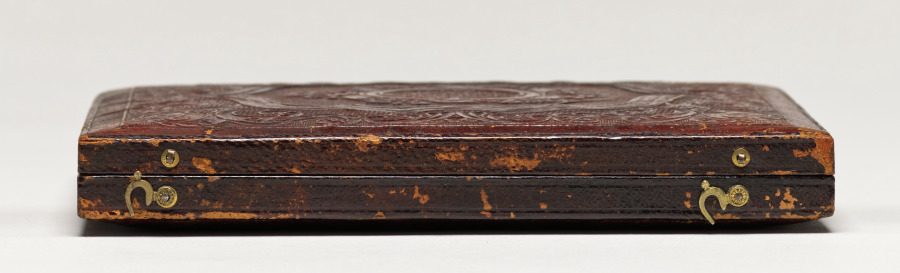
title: St. Anthony Falls from Across the River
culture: America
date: c. 1853–54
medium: daguerreotype, half-plate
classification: Photograph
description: In this image of St. Anthony Falls, the unidentified daguerreotypist made an "instantaneous view" of a remarkable natural wonder, rendering its specific geological formation with exacting clarity. Above a narrow channel where the Mississippi River runs between steep bluffs in Minneapolis, Minnesota, the falls churns away at the bedrock over which it descends. Named by Father Louis Hennepin during his travels in 1680, it is the only significant waterfall on the entire Mississippi River. The specific motivations of the photographer remain unknown. He or she may have wished the photograph to be scientific and documentary, a valuable visual aid for an artist, or just a reminder to a curious resident. No doubt, this daguerreotype was a rare image of the environment's unspoiled condition before the mid 1850s, when demand for an inexpensive energy source irreparably changed this area from a natural to industrial landscape.